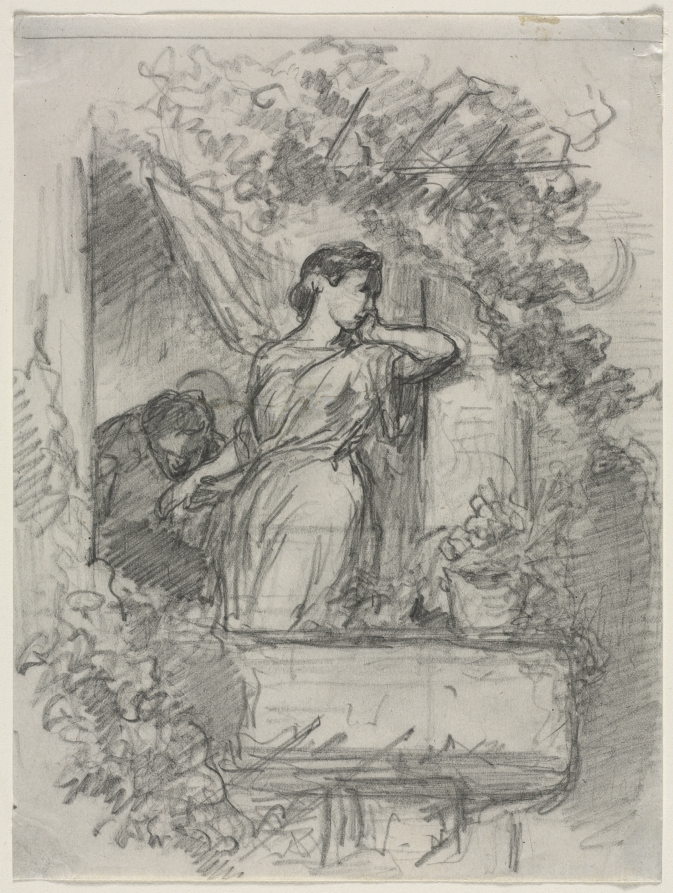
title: On the Balcony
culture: France, 19th century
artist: Célestin François Nanteuil (French, 1813–1873)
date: c. 1827–73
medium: pencil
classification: Drawing